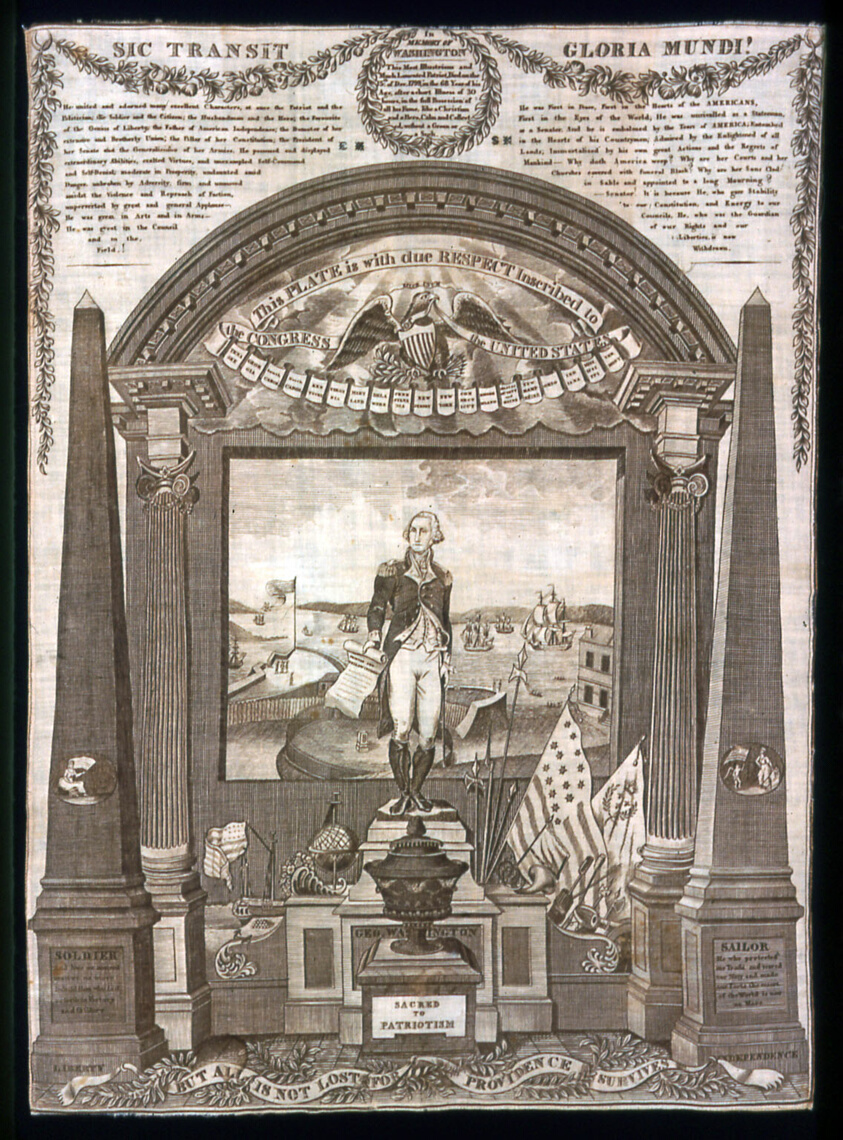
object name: Textile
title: Handkerchief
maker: Possibly printed by Charles Gray (Scottish, active c. 1819) or Colin Gillespie (Scottish, active c. 1819); Engraved by Cornelius Tiebout (American, 1777–1832) after a drawing by Charles Buxton (American, 1768–1833) and Gilbert Stuart (American, 1755–1828); Scotland, Glasgow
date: 1819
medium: Cotton, plain weave; copperplate printed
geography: Glasgow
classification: textile; weaving - printed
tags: propaganda